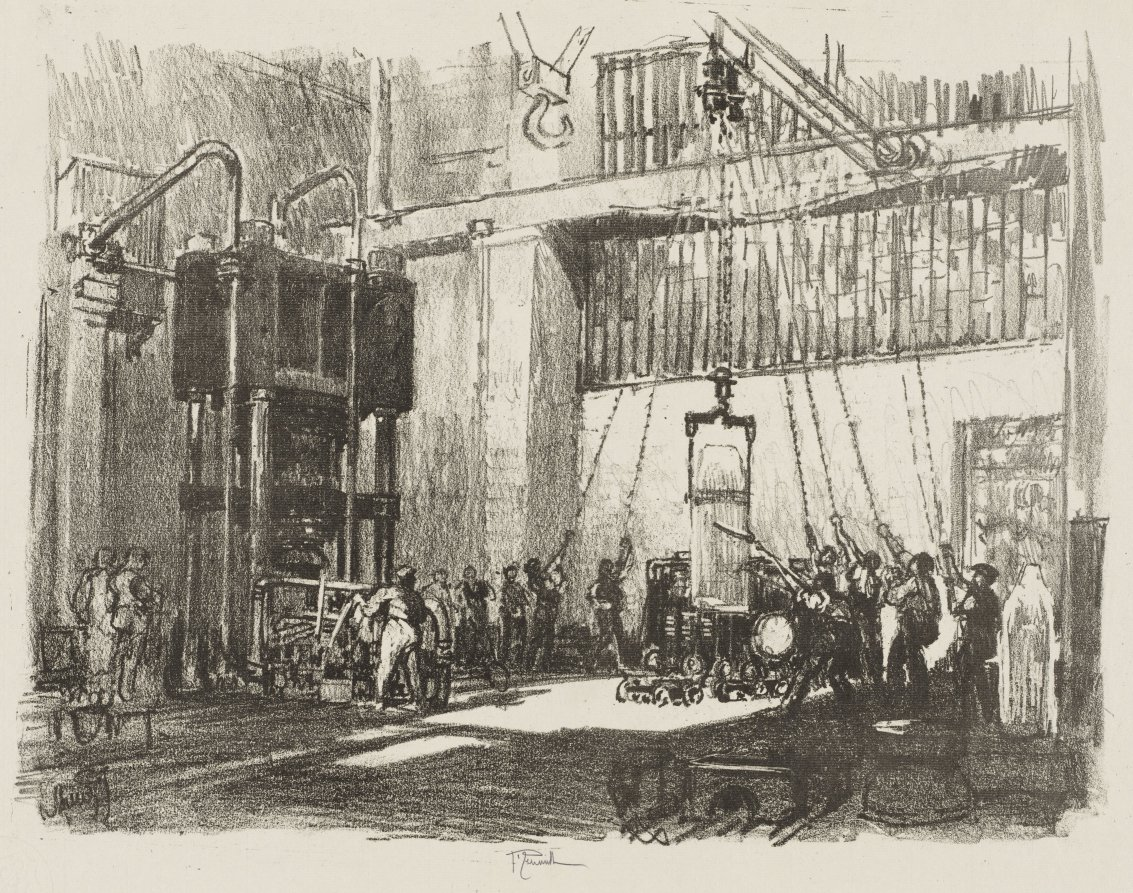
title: English War Work: Bottling the Big Shell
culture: America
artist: Joseph Pennell (American, 1857–1926)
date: 1916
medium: lithograph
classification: Print